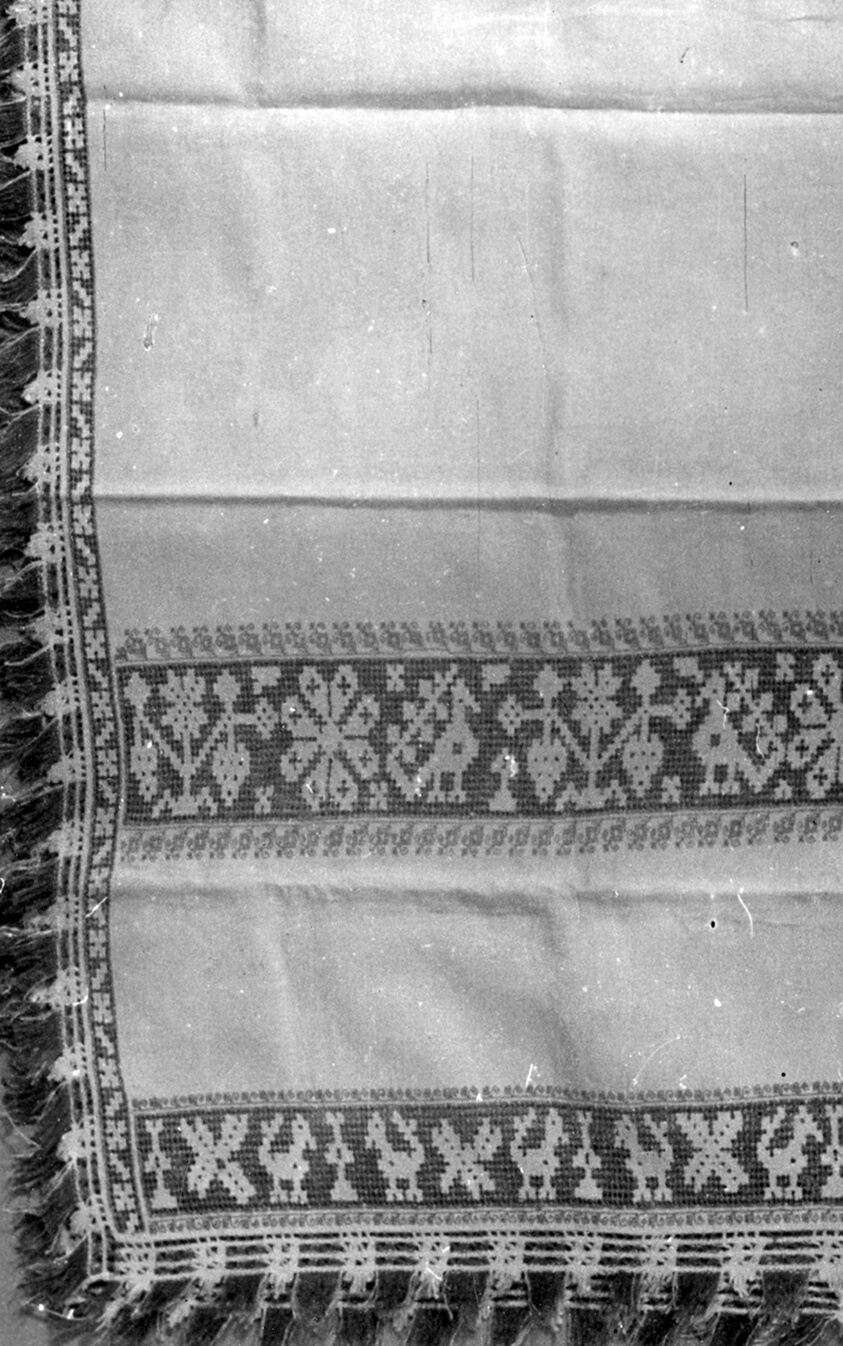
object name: Textile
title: Cover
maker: Italy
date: 17th century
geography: Italy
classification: textile; needlework (visual works)